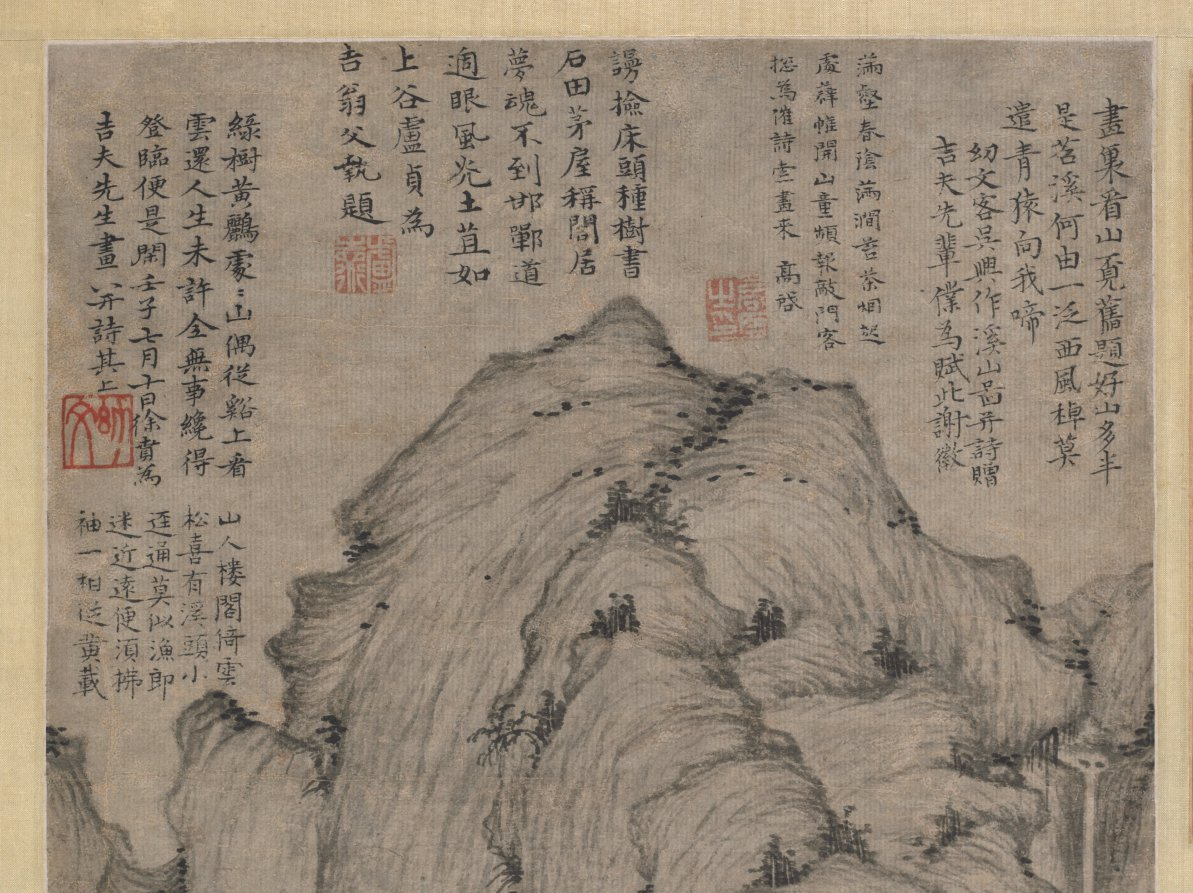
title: Streams and Mountains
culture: China, Yuan dynasty (1271-1368)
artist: Xu Ben (Chinese, 1335–1380)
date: 1372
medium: hanging scroll, ink on paper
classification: Painting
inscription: 綠樹黃鸝處處山， 偶從谿上看雲還。/ 人生未許全無事， 纔得登臨便是閑。 壬子七月十日徐賁為吉夫先生畫 並詩共上 [印] 幼文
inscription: Label on mounting probably by Liang Qingbiao 梁清標 (1620–1691).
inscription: 4 additional inscriptions and 9 additional seals: 1 poem of Xie Hui 謝徽 (c. 2nd half 14th c.); 1 poem and 1 seal of Gao Qi 高啟 (1336–1374); 1 poem and 1 seal of Lu Zhen 盧貞 (c. late 14th c.); 1 poem of Huang Zai 黃載; 3 seals of Liang Qingbiao 梁清標 (1620–1691); 1 seal of Wang Jiqian [C. C. Wang] 王季遷 (1907–2003); 3 seals unidentified.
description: Like many literati of the late Yuan and early Ming dynasties, Xu Ben was entangled with the perils of dynastic change as well as the ups and downs of his official career. It was mainly through the art of painting and poetry, as well as the ideal of reclusion, that he sought feelings of exhilaration and shared them with his friends. Xu created this monumental landscape during one of his periods of reclusion. His innumerable “hemp-fiber” texture strokes create a unifying rhythm among the towering mountains with tightly knit masses of rocks. Nestled among shady trees at the base of the mountain is a rustic retreat, which a scholar approaches on foot to visit with the hermit. Among the five inscriptions at the top of the painting is one by the artist himself. He dedicated the painting to someone named Jifu 吉夫 and recorded a poem in praise of mountains. Green trees, yellow orioles, everywhere are mountains; Aimlessly I return from the stream, where I watched the clouds. Man's life does not allow unbroken ease, But to be able to be high up in the mountain, this is leisure.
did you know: An attendant opens a reed gate to welcome the scholar with a walking stick approaching the rustic retreat.